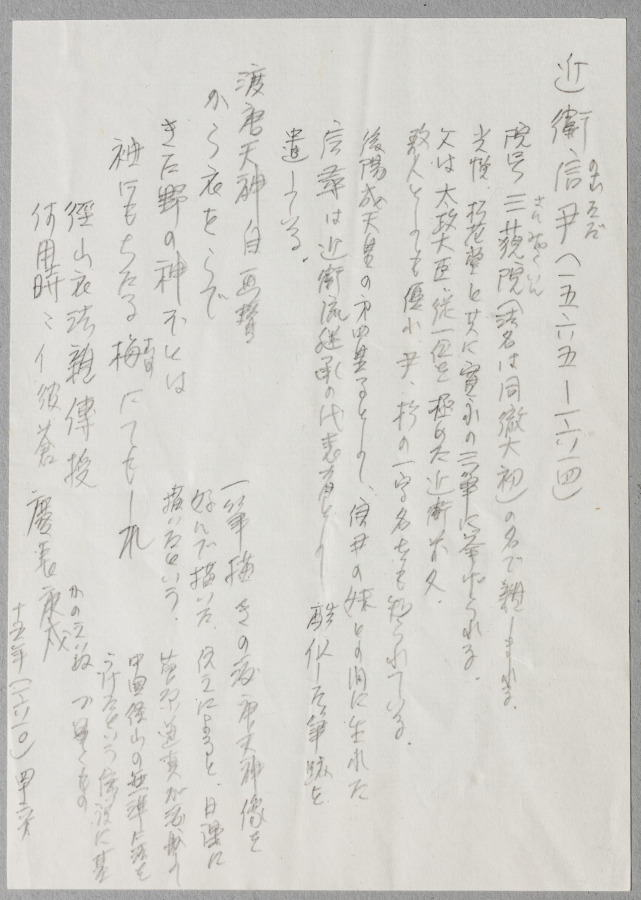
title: Tenjin Traveling to China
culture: Japan, Momoyama period (1573–1615)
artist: Konoe Nobutada (Japanese, 1565–1614)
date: 1610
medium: hanging scroll; ink on paper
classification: Painting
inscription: signed: Nobutada's cipher signature kao inscribed: two poems above, dated Keicho 15